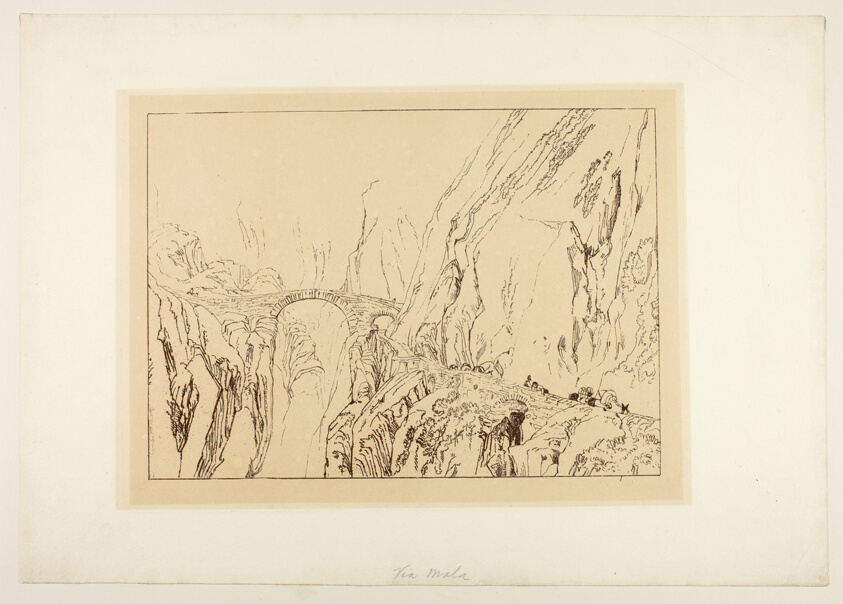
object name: Print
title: Via Mala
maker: Joseph Mallord William Turner (English, 1775-1851)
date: c. 1815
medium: Etching in brown on ivory wove paper, laid down on board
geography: England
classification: etching; print; prints and drawing